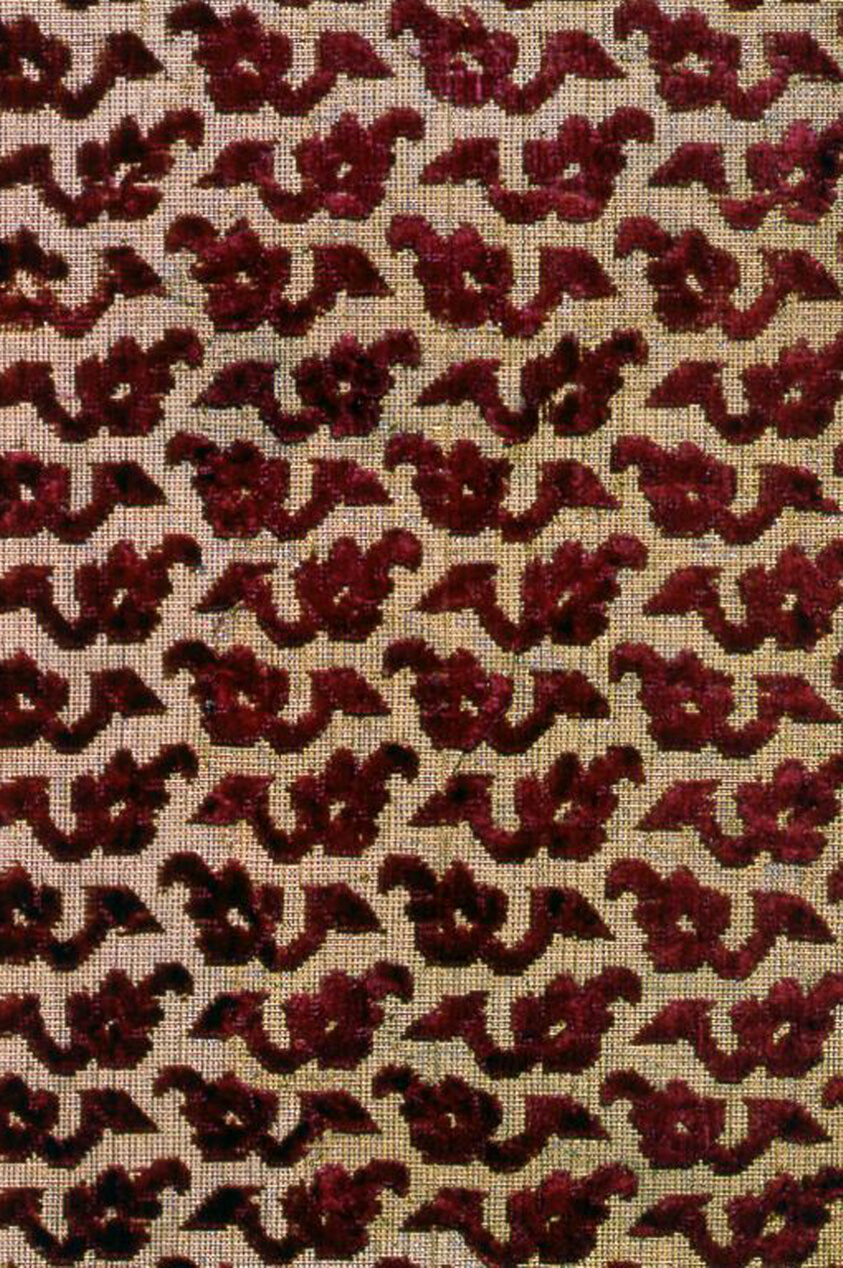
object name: Textile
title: Five Fragments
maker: Italy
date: 1601/25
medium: Silk and gilt-metal strip, plain weave with supplementary facing wefts and supplementary pile warps forming cut and uncut voided velvet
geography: Italy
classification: textile; weaving - velvet